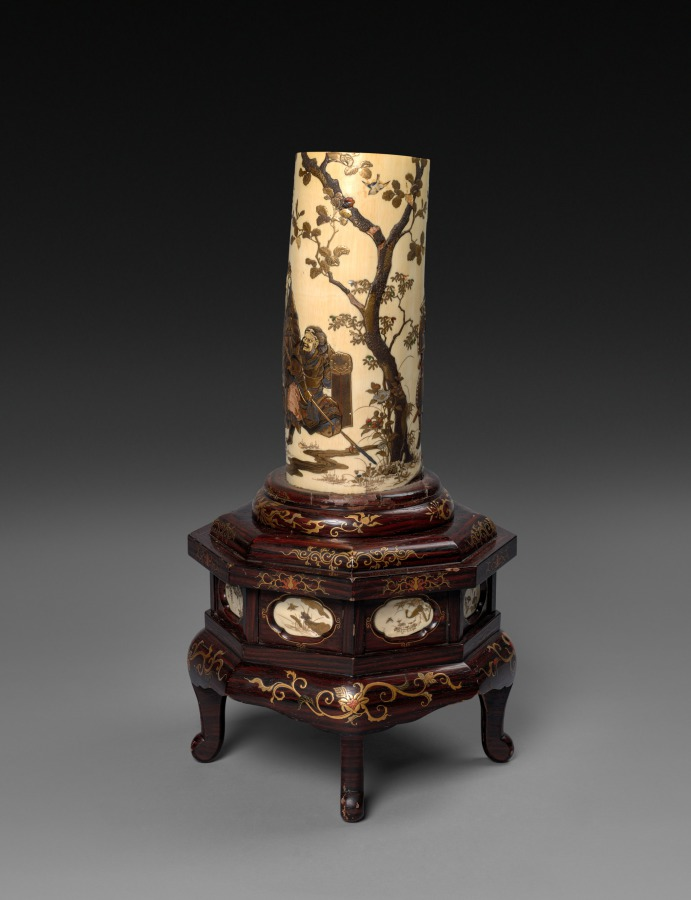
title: Ivory Tusk Vase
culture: Japan, Meiji period (1868–1912)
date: late 1800s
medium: carved ivory, pigment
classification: Ivory